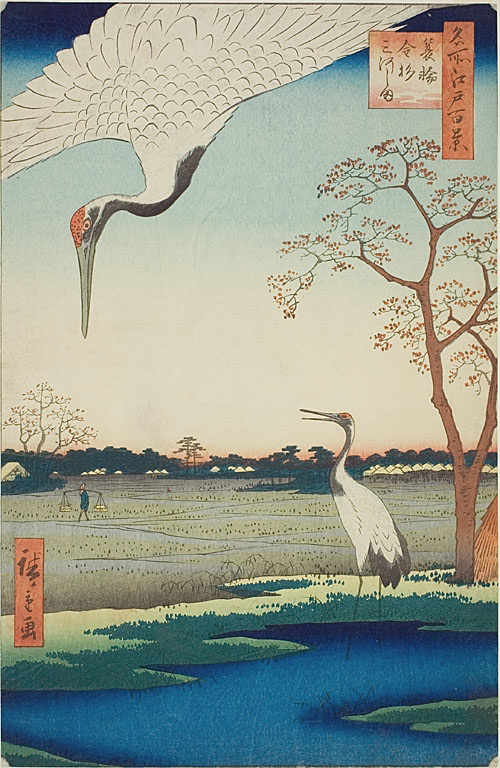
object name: Print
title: Minowa, Kanasugi, Mikawashima, No.102 from the series “One Hundred Famous Views of Edo (Meisho Edo hyakkei)”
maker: Utagawa Hiroshige (Japanese, 1797-1858)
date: 1857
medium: Color woodblock print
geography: Japan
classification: woodblock print; print; asian art